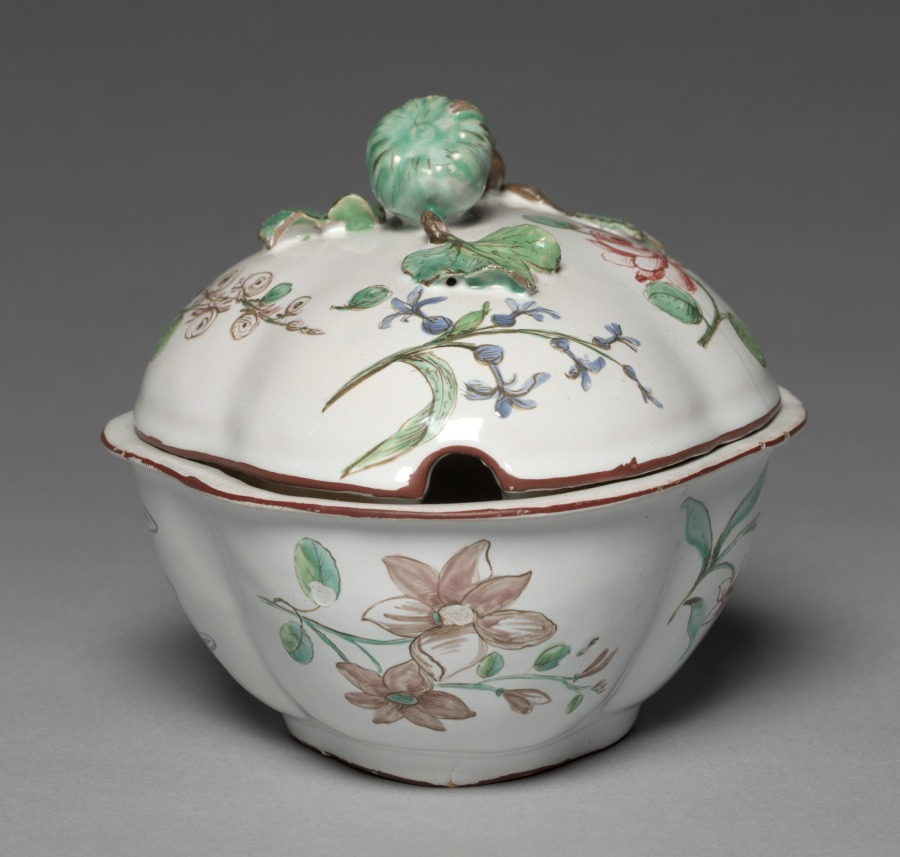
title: Sugar Basin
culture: France, 18th century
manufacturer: Sceaux Factory (French, active 1748–66)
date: c. 1750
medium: faience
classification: Ceramic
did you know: In medieval Italian churches, painted altarpieces served as a focal point for worshippers during the rituals of faith. The figures of Jesus, Mary, and eight saints are framed by a golden background that would have glistened in the flickering candlelight of the church.